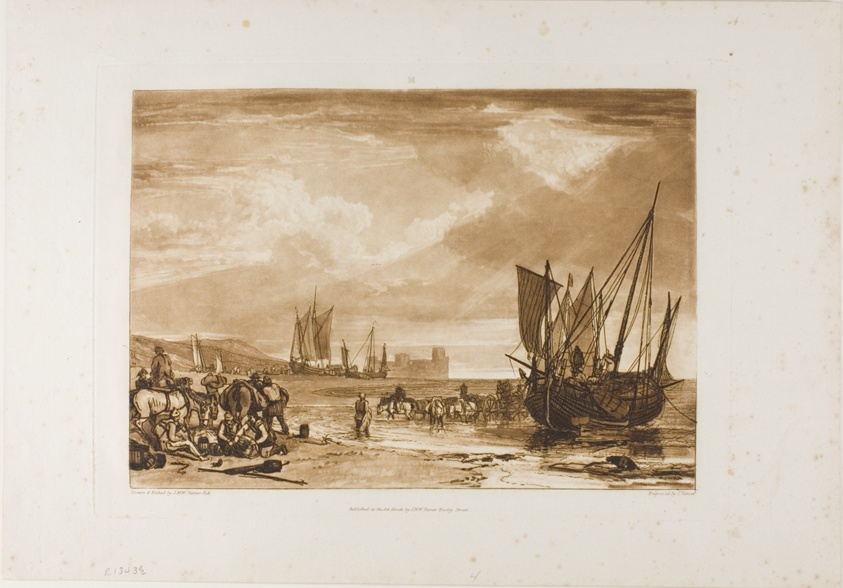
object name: Print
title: Scene on the French Coast, plate 4 from Liber Studiorum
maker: Joseph Mallord William Turner (English, 1775-1851); Engraved by Charles Turner (English, 1773-1857)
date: published 1807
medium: Etching and engraving in brown on ivory laid paper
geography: England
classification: etching; print; prints and drawing